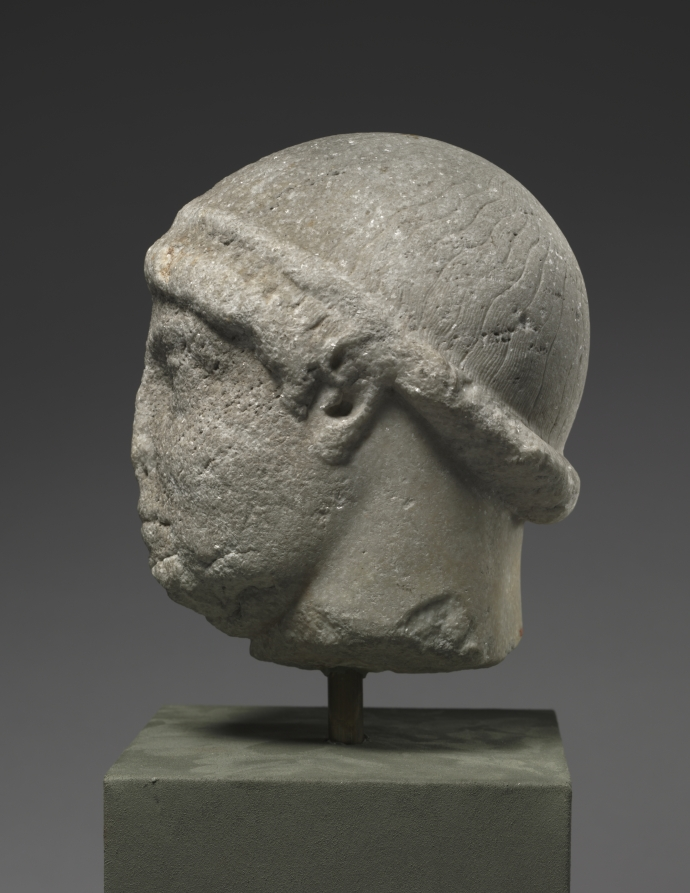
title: Head of Youth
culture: Sicily(?), Greek, Severe period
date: c. 470 BCE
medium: marble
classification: Sculpture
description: Although the face is now badly broken and quite weathered, this head was originally of high-quality workmanship, as can be seen in the extremely fine carving of the wavy hair preserved at the top and back. The slight asymmetry of the neck and facial features suggest that the head, which likely belonged to a full-bodied sculpture just under life-size, turned gently to one side.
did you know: The Severe style, named for its sober simplicity, marks the beginning of the Greek Classical period, c. 480–450 BC.